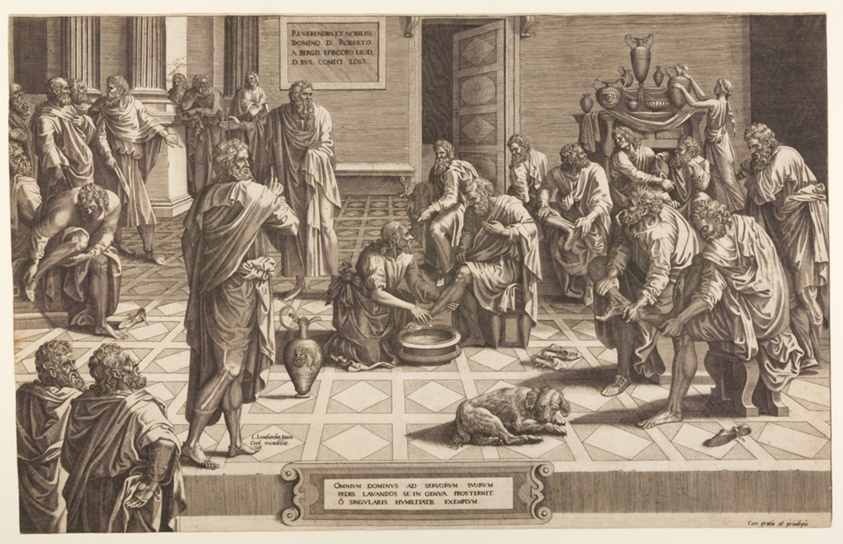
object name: Print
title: Christ Washes the Feet of the Apostles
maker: Hans Collaert I (Flemish, c. 1530–1581); after Lambert Lombard (Flemish, 1505–1566)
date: c. 1557-64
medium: Engraving on ivory laid paper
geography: Flanders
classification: engraving; paper; print; prints and drawing